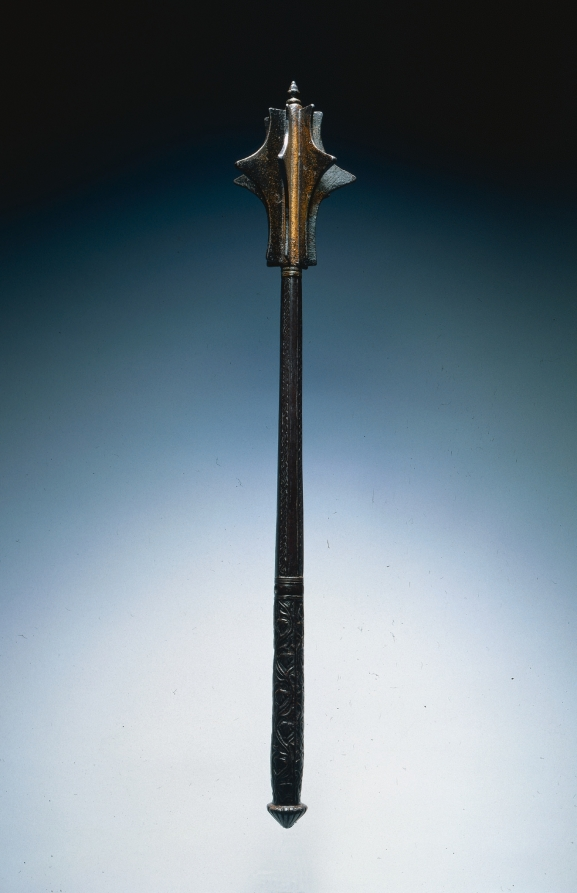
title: Seven-Flanged Mace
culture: Italy (?), 16th century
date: c. 1540–50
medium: gilded russet steel; with chiseled foliate decoration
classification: Arms and Armor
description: The mace was primarily a weapon for mounted warriors in both actual combat and courtly contests. For this reason it was regarded as a knightly weapon. Arming oneself with a mace had gradually taken on significance among the nobility and commanding officers. It eventually came to be considered a badge of rank, to be carried by its owner in parades and other ceremonial occasions, as this decorated example certainly was.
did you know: In use throughout the middle ages, the mace became increasingly popular in the 1400s and 1500s because edged weapons (such as swords) were ineffective against fully developed plate armor.